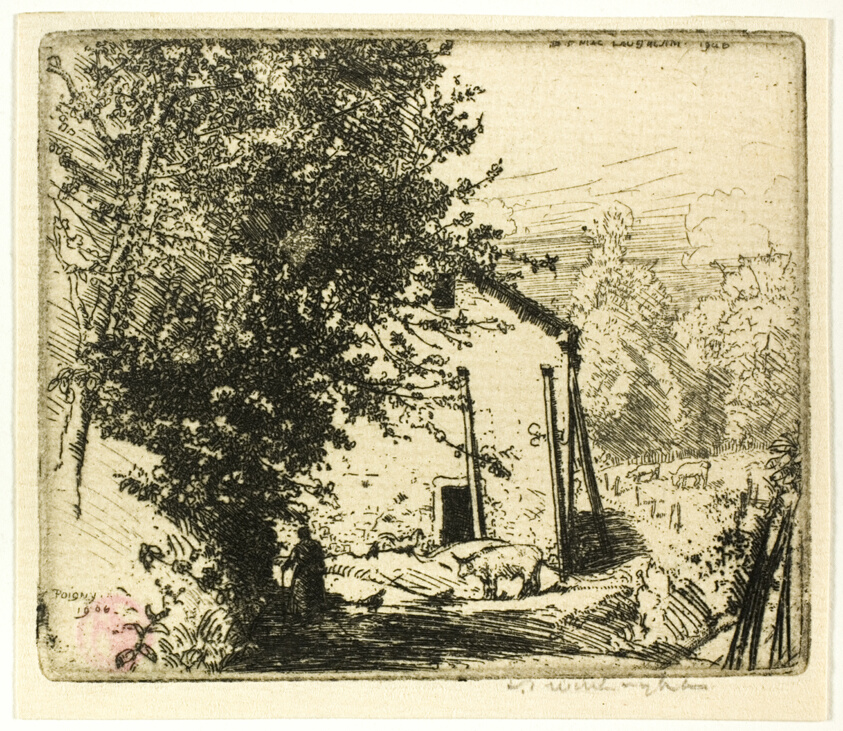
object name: Print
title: Little Poigny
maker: Donald Shaw MacLaughlan (American, born Canada, 1876-1938)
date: 1906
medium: Etching in black on cream laid paper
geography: United States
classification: etching; print; prints and drawing